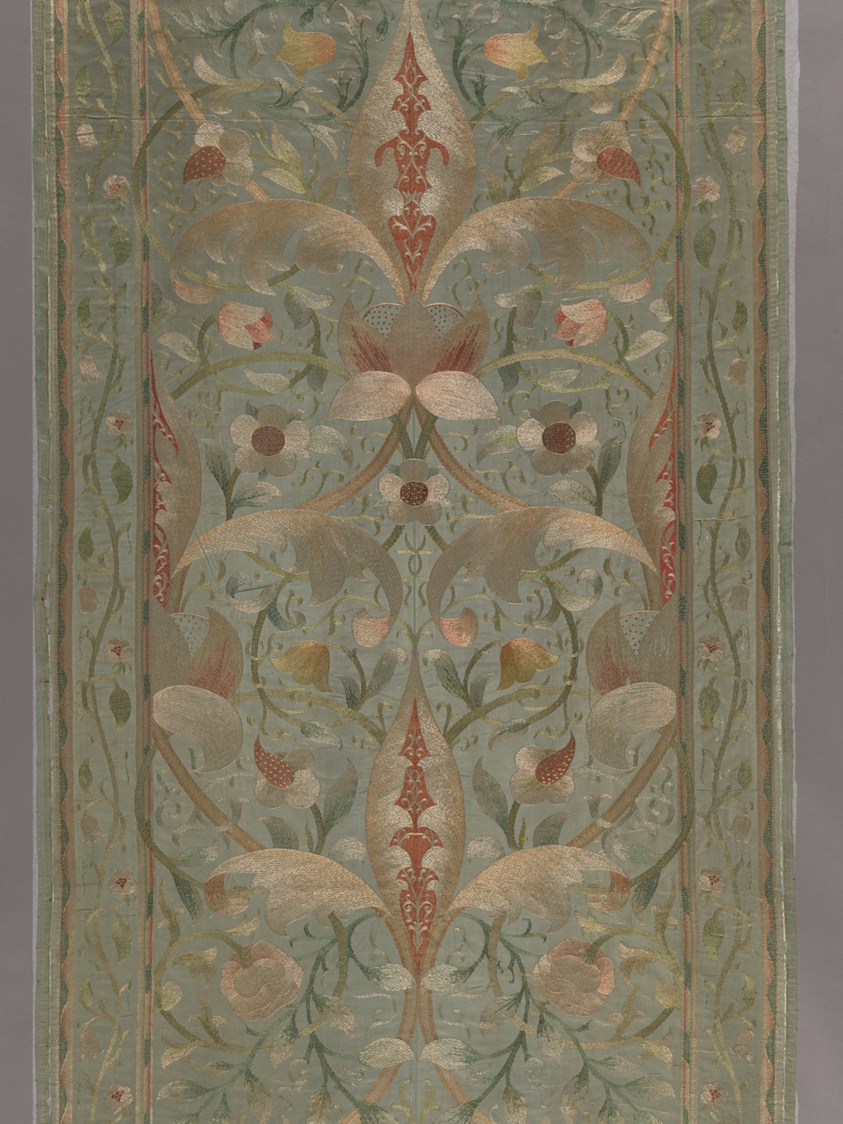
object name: Textile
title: Lotus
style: Arts and Crafts Movement, british, 19th century, British Arts and Crafts Movement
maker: Design attributed to May Morris (English, 1862–1938); Produced by Morris & Co., London (English, 1875–1940); Embroidered by the Decorative Arts Society, Chicago (American, founded 1877)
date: Design by 1888, made 1888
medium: Silk, warp-float faced twill weave; embroidered in satin and stem stitches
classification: textile; needlework (visual works)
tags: floral, lotus